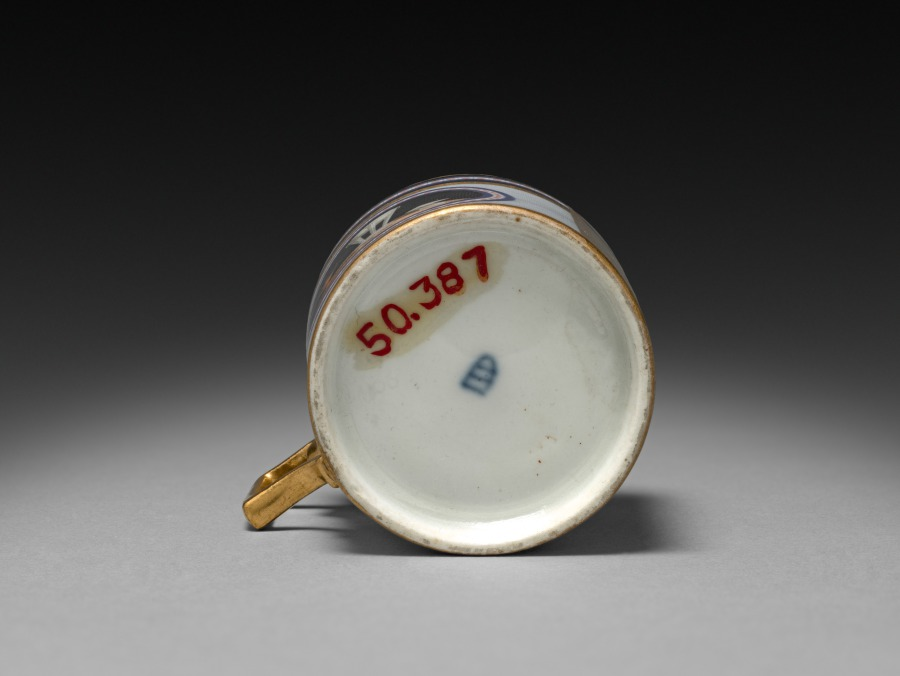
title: Cup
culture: Austria, Vienna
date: c. 1800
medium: porcelain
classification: Ceramic